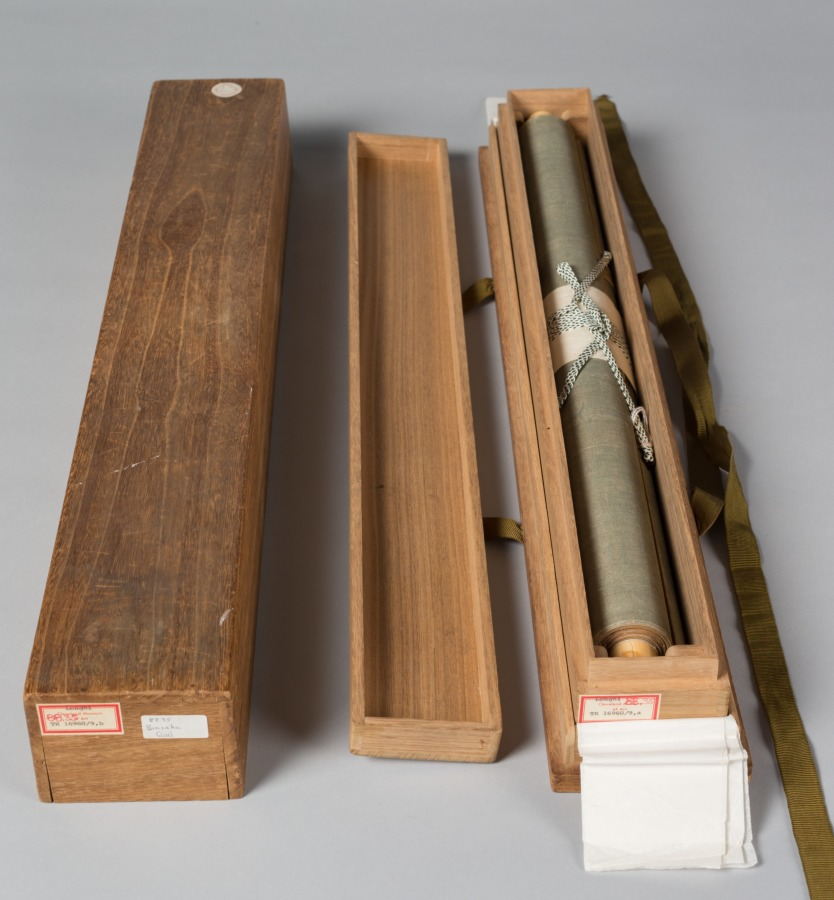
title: Owl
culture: Japan, Edo period (1615–1868)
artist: Tsuda Bensaku (Japanese, active 1620s–40s)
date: 1630s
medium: hanging scroll; ink and slight color on paper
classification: Painting